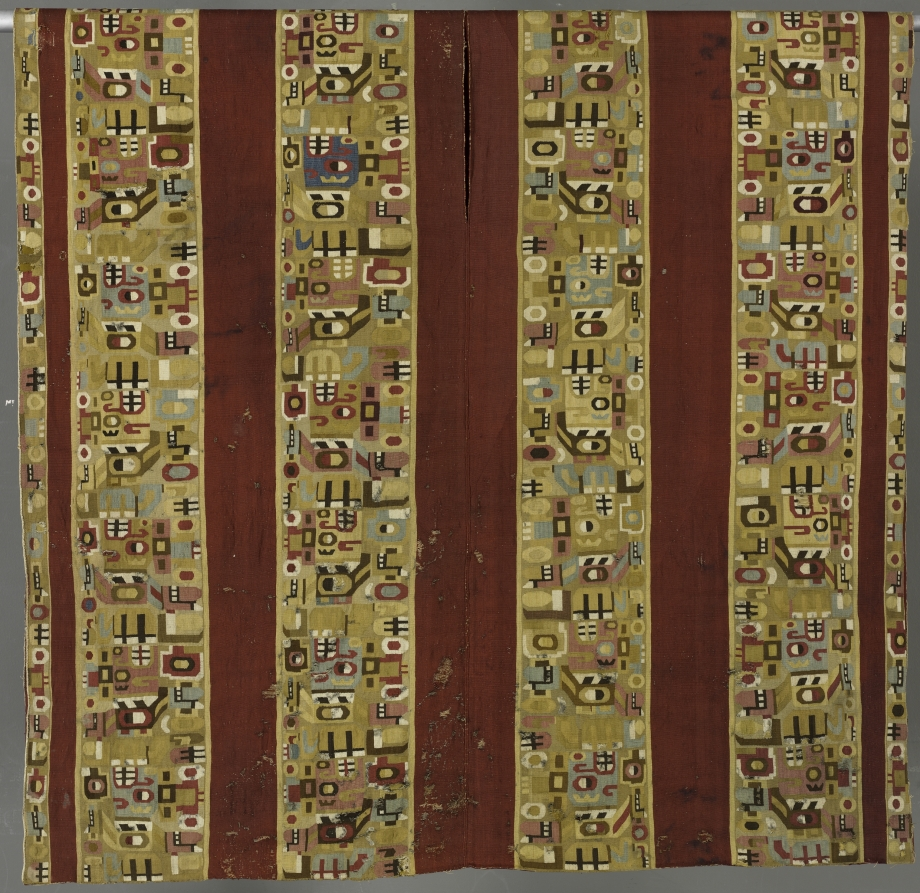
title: Tunic with Sacrificer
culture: South America, Peru, Central Andes, Middle Horizon, Wari people, 7th-11th century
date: 600–1000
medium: camelid-fiber, cotton; tapestry weave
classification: Textile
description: An extremely abstract supernatural sacrifice repeats in different colors and orientations across the body of this tunic, which was shortened on one side in antiquity. Look for the toothy black-and-white mouth in the sacrificer's upward-gazing head; other facial features include a button nose and a vertically divided eye. The figure holds the L-shaped haft of an axe behind its back and, at the front of its body, a short staff with a severed, upside-down human head on the top.